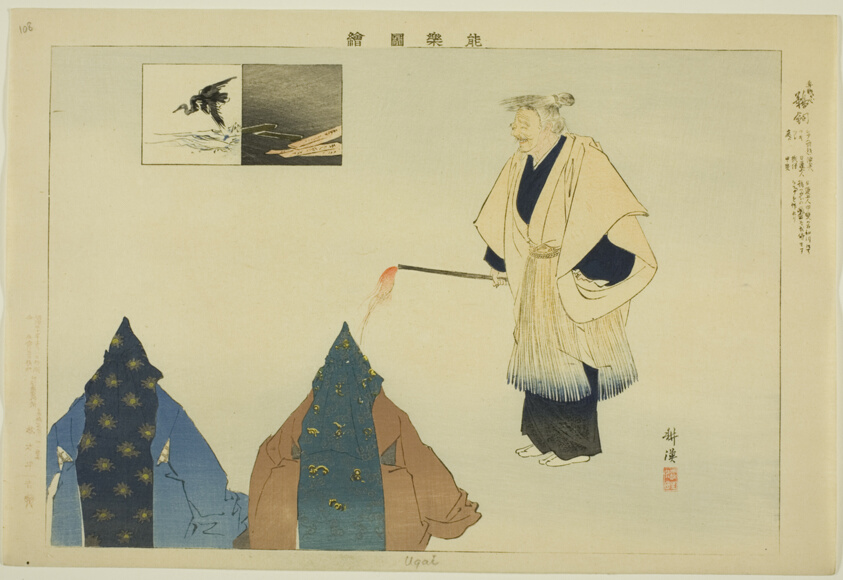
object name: Print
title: Ugai, from the series "Pictures of No Performances (Nogaku Zue)"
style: Japanese (culture or style)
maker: Tsukioka Kogyo; Japanese, 1869-1927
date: 1898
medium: Color woodblock print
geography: Japan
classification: woodblock print; print; asian art